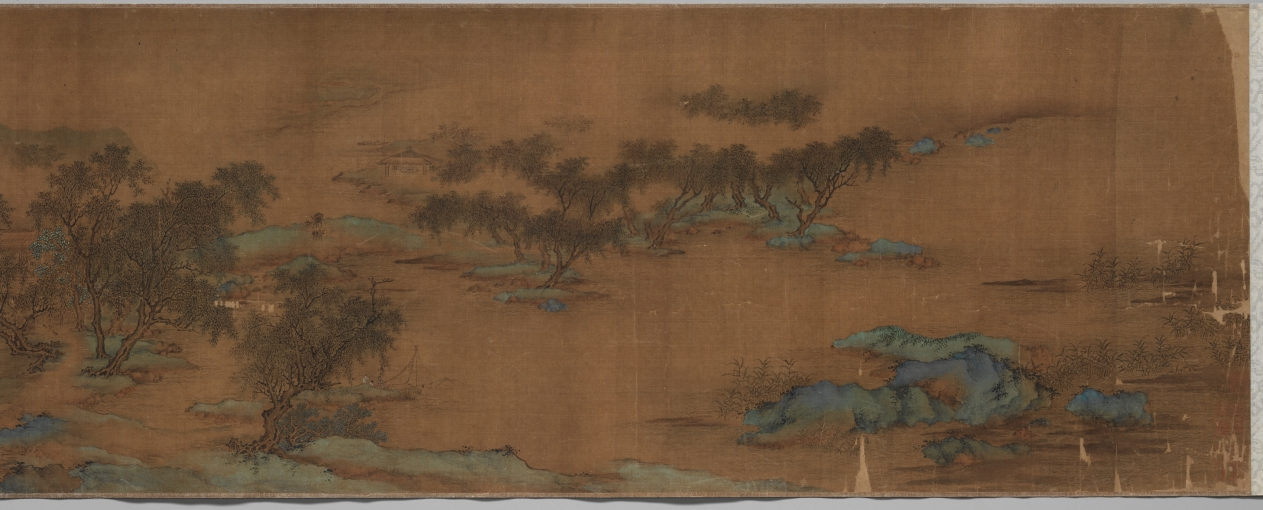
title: Landscape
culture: China, Ming dynasty (1368–1644)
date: 1368– 1644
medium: handscroll; ink and slight color on silk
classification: Painting